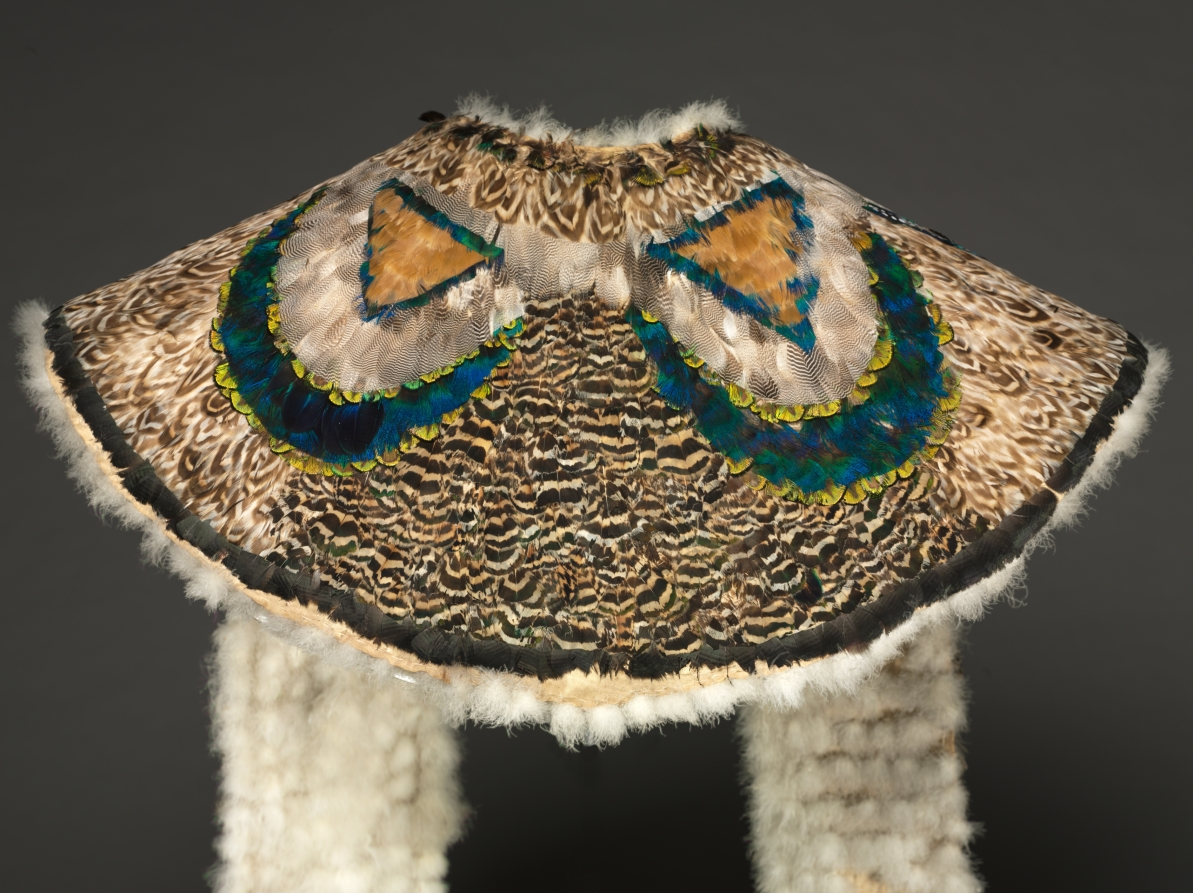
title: Pelerine (Collar or Cape)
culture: Northeastern Woodlands, Great Lakes/St. Lawrence River Region or Europe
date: c. 1830–1860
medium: Cotton, peacock feathers, guinea fowl feathers?, Gadwalls duck feathers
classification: Textile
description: Experts argue about collars of this type: Did a Great Lakes native artist make it, using as a model an English lady’s pelerine and exotic feathers obtained through trade? Or was the collar created by a European feather worker, perhaps after seeing the spectacular feather capes of native Hawaiian royals who visited England in 1824? There are arguments for both views—and for further research.